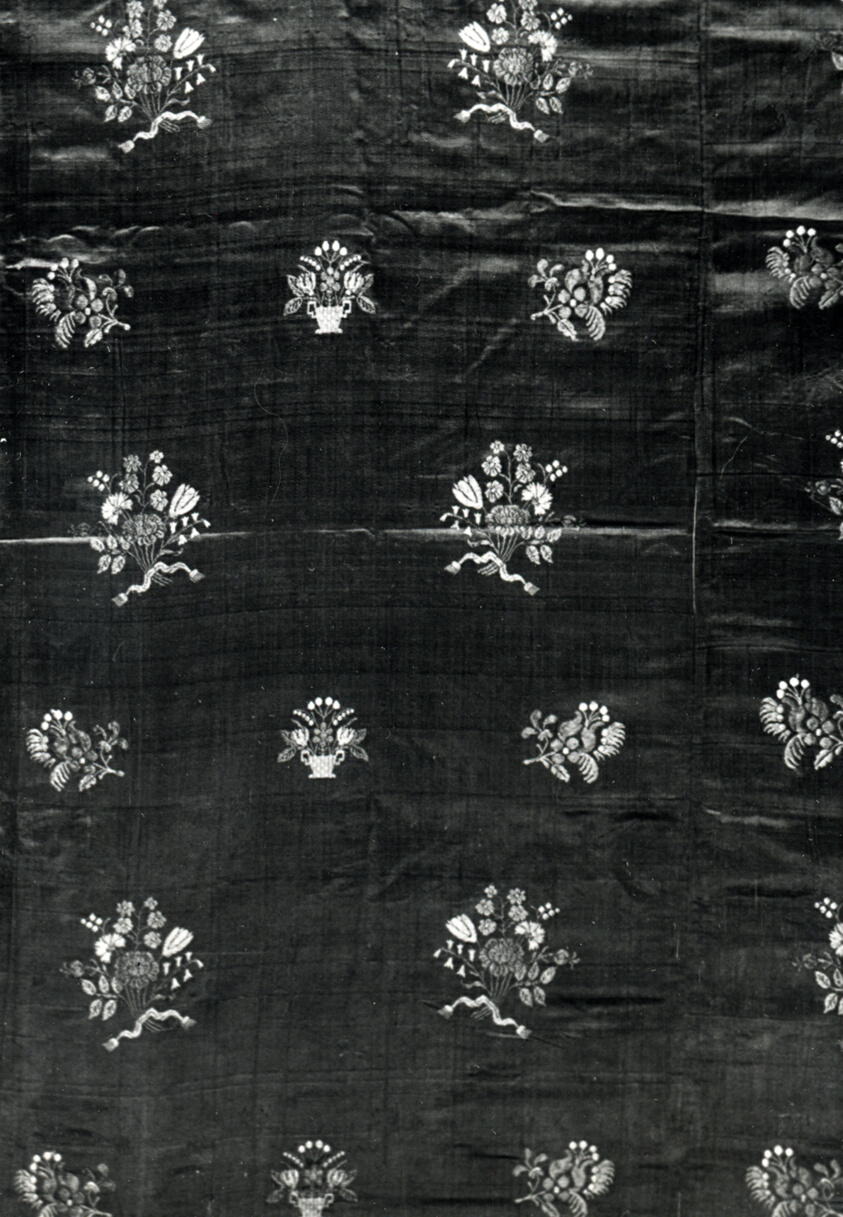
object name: Textile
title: Panel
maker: France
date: 1801/25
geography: France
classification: textile; weaving